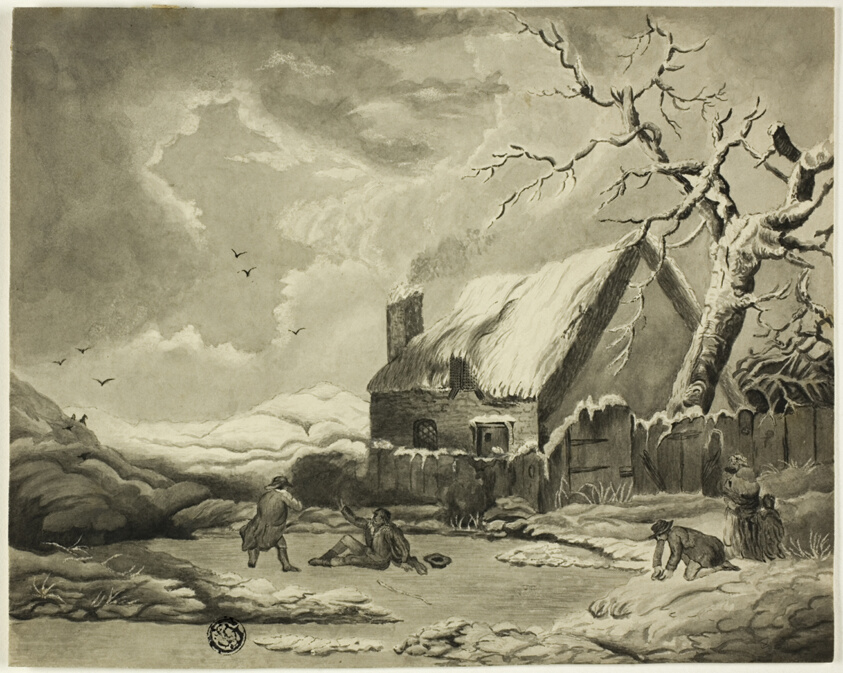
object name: Drawing and Watercolor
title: Winter Scene with People Outside a Cottage Near a Pond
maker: Unknown artist (possibly 19th century)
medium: Brush and black and gray wash, with scraping, on cream wove card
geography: Unknown Place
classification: ink or chalk wash; drawings (visual works); prints and drawing